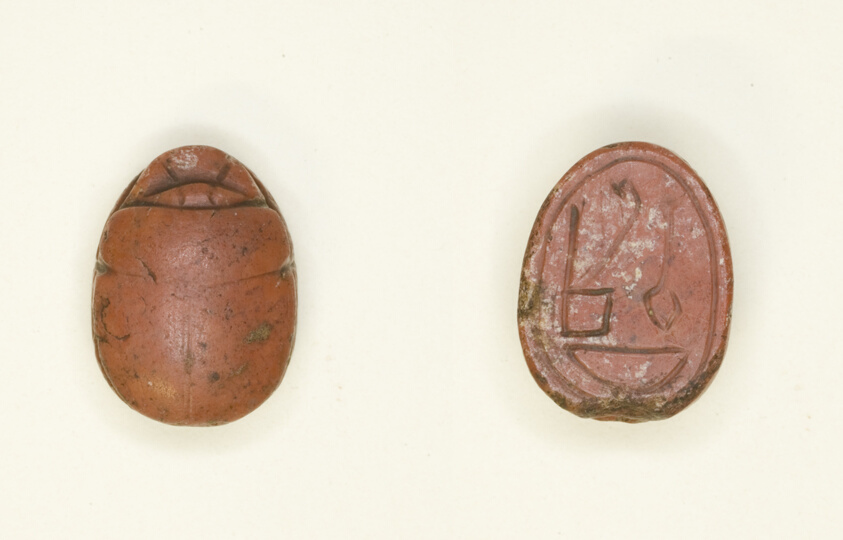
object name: Costume and Accessories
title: Scarab: Hieroglyphs (Red Crown, nfr- and nb-Signs: Trigramme of Amun)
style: new kingdom, nineteenth dynasty, eighteenth dynasty, ancient, egyptian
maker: Egyptian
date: New Kingdom, Dynasties 18–19 (about 1550–1186 BCE)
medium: Stone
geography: Egypt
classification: scarab; ancient art; costume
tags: scarab beetle, insects, Hieroglyphs